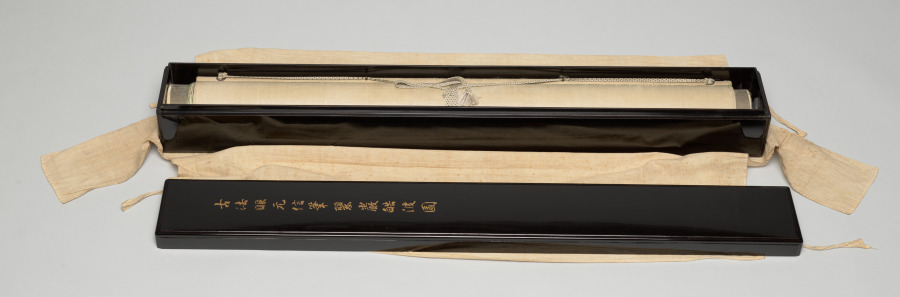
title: Rocks and Waves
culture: Japan, Muromachi period (1392–1573)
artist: attributed to Kano Motonobu (Japanese, c. 1476–1559)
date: early to mid-1500s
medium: sliding door fragment mounted as a hanging scroll; ink and gold wash on paper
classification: Painting